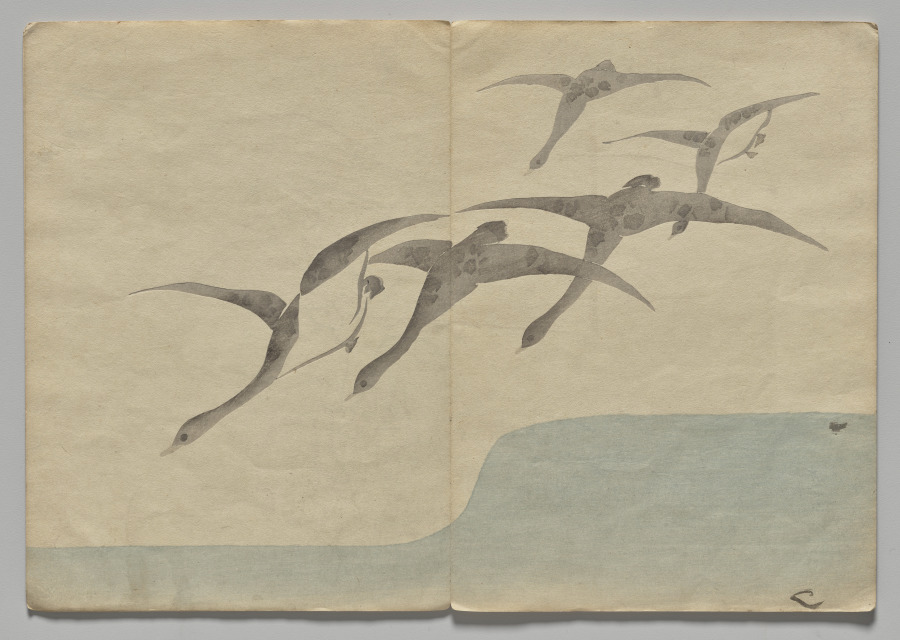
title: Scene from The Kōrin Picture Book (Volume 1)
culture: Japan, Edo period (1615–1868)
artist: Nakamura Hōchū (Japanese, d. 1819)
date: 1800s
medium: color woodblock printed book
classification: Bound Volume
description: Ogata Korin (1658-1716) was one of the most admired artists of Rimpa, or "decorative school painting." These books by the charming later-generation Rimpa artist Hochu record Korin's inventive designs.